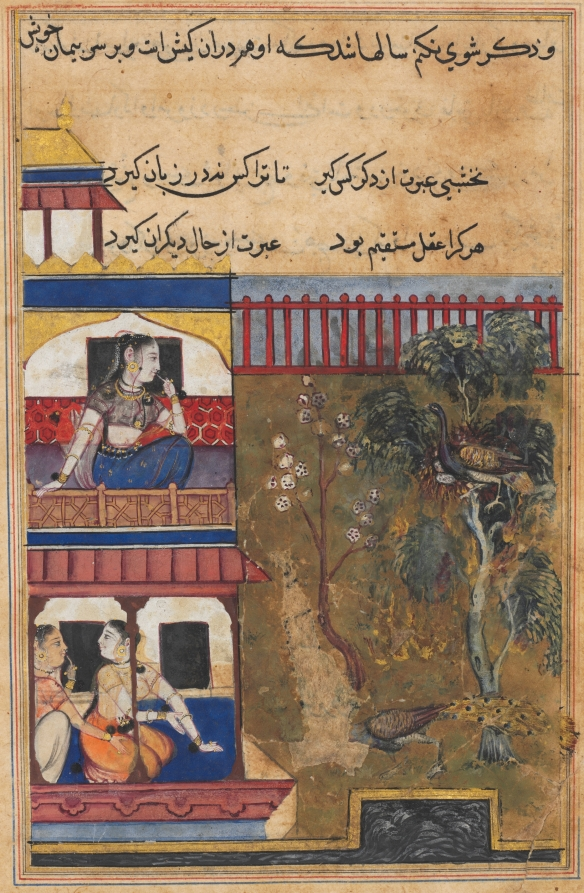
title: The queen of Rum watches the peahen prefer to burn rather than abandon her eggs while the peacock flees the nest, from a Tuti-nama (Tales of a Parrot): Thirty-ninth Night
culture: Mughal India, court of Akbar (reigned 1556–1605)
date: c. 1560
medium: gum tempera, ink, and gold on paper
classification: Painting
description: The queen of Rum sits in the upper balcony of her palace watching the fire in her garden with shock. Two female attendants observe the action from the room below. The cowardliness of the peacock in the face of danger convinced the queen of the disloyalty of men. As a result, she vowed to never marry.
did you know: Rum is the Arabic name of Rome and once designated the Byzantine Empire.